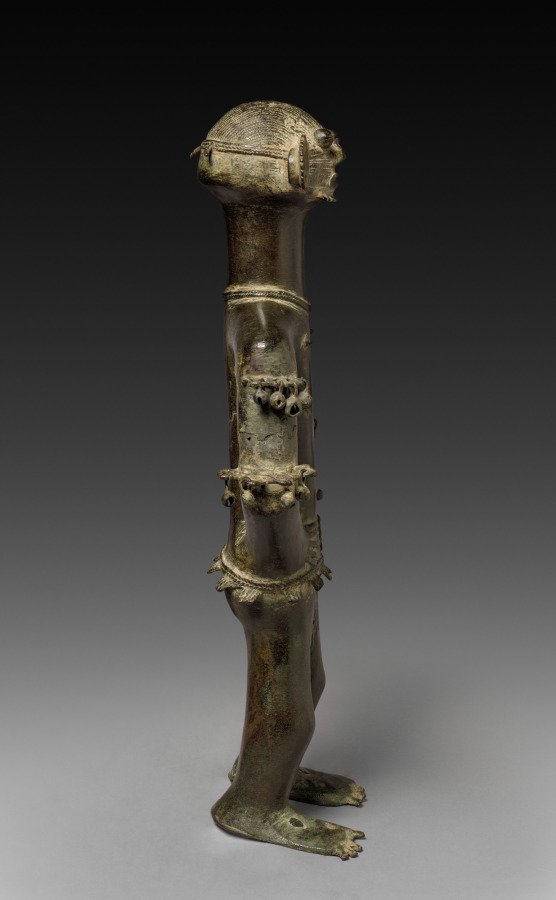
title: Male figure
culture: Africa, West Africa, Nigeria, Benue River Valley, Unidentified maker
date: probably 1800s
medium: Copper alloy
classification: Sculpture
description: Realized in a very distinctive style using the lost-wax method, this figure’s cultural origin and function is limited because it was removed from Nigeria during that country’s turbulent civil war of the late 1960s. Perhaps it was once part of an altar or shrine dedicated to a guardian or tutelary spirit. Connotations of prestige and wealth may explain why copper-alloy objects were diffused across vast territory and inherited over many generations.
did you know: Figurative copper-alloy objects like this sculpture point to intense trade and the circulation of people, goods, and technologies in the Benue River Valley, resulting in a highly cosmopolitan society.